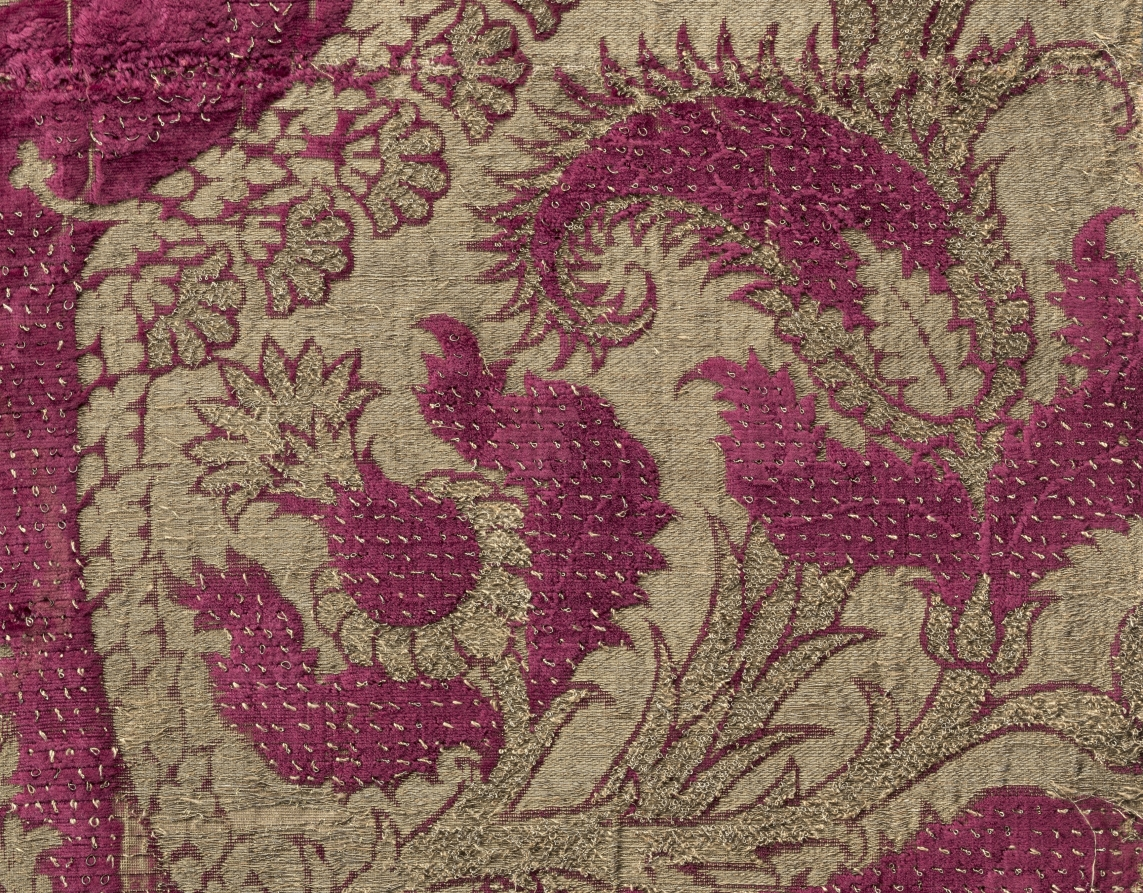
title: Velvet with Pomegranate Pattern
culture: Italy, Florence, 15th century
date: 1450–1500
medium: silk, gold thread; velvet: three heights of cut pile, gold thread loops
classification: Velvet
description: This extravagant Italian velvet with three heights of lush crimson pile is lavishly embellished with gold-thread loops. Large pomegranate patterns such as this were fashionable in Europe for more than a century, about 1420 to 1550, and were often featured in paintings and in large wall tapestries. Variations occurred in pattern details, pile height, and gold thread. Since pomegranates symbolized eternity, fertility, and resurrection, these velvets were often used in Roman Catholic churches. This pomegranate pattern inspired the cope, or cloak, worn by the Archbishop of Canterbury when he officiated the royal wedding of Prince William and Kate Middleton in 2011.